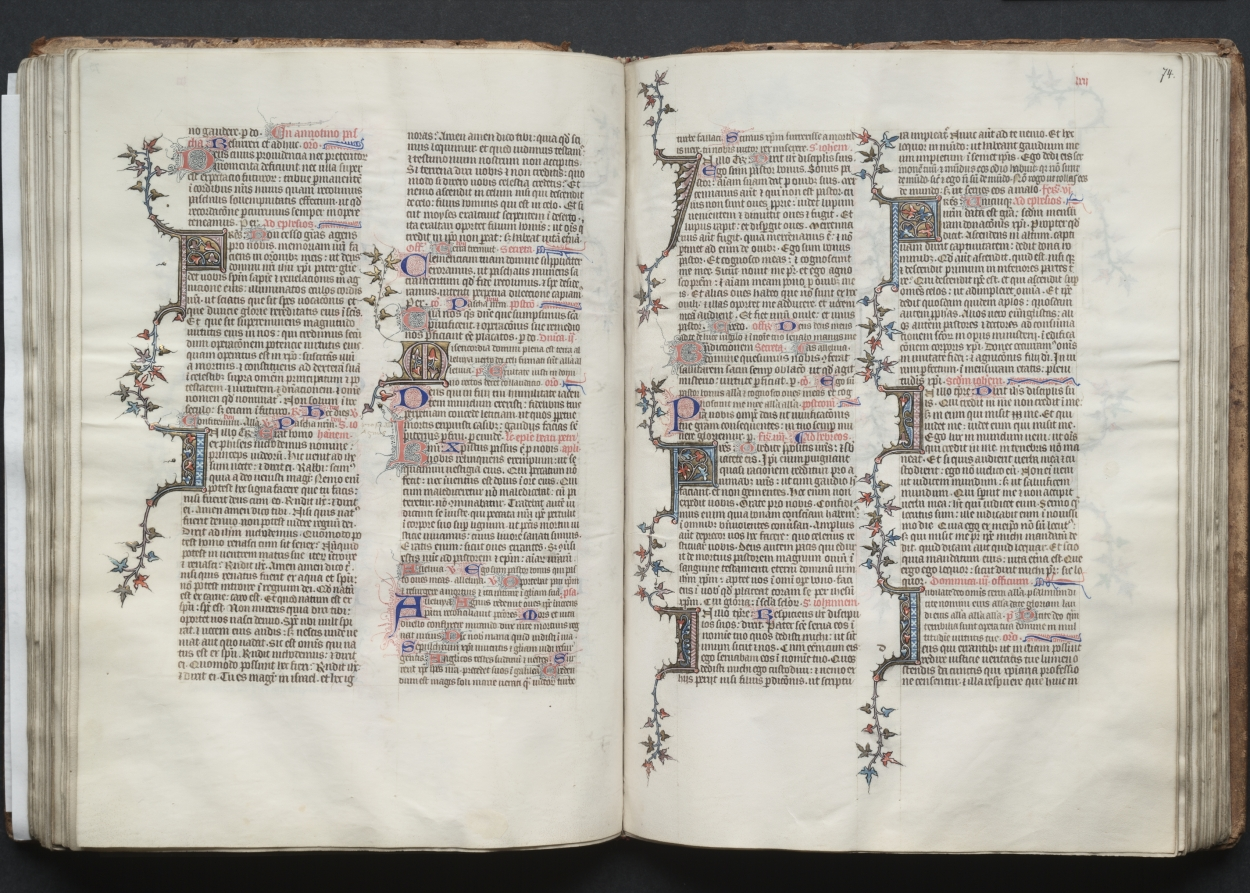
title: The Gotha Missal: Fol. 73v, Text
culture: France, Paris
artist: Master of the Boqueteaux (French)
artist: and Workshop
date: c. 1375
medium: ink, tempera, and gold on vellum; blind-tooled leather binding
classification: Bound Volume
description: The style and quality of this manuscript's decoration is typical of deluxe Parisian books made for aristocratic or royal patrons. Most of the book's decoration appears to be the work of the Master of the Boqueteaux, an artist active at the court of King Charles V (died 1380). His style was apparently shared by a number of book illuminators working in and around Paris. It is very possible that the Gotha Missal belonged to Charles V, but is not provable because the manuscript has no royal portraits and lacks a colophon. Given the book's magnificent decoration, however, it would seem that it was produced for a Valois prince, if not for the king himself. The manuscript receives its name from the German dukes of Gotha, its later owners.